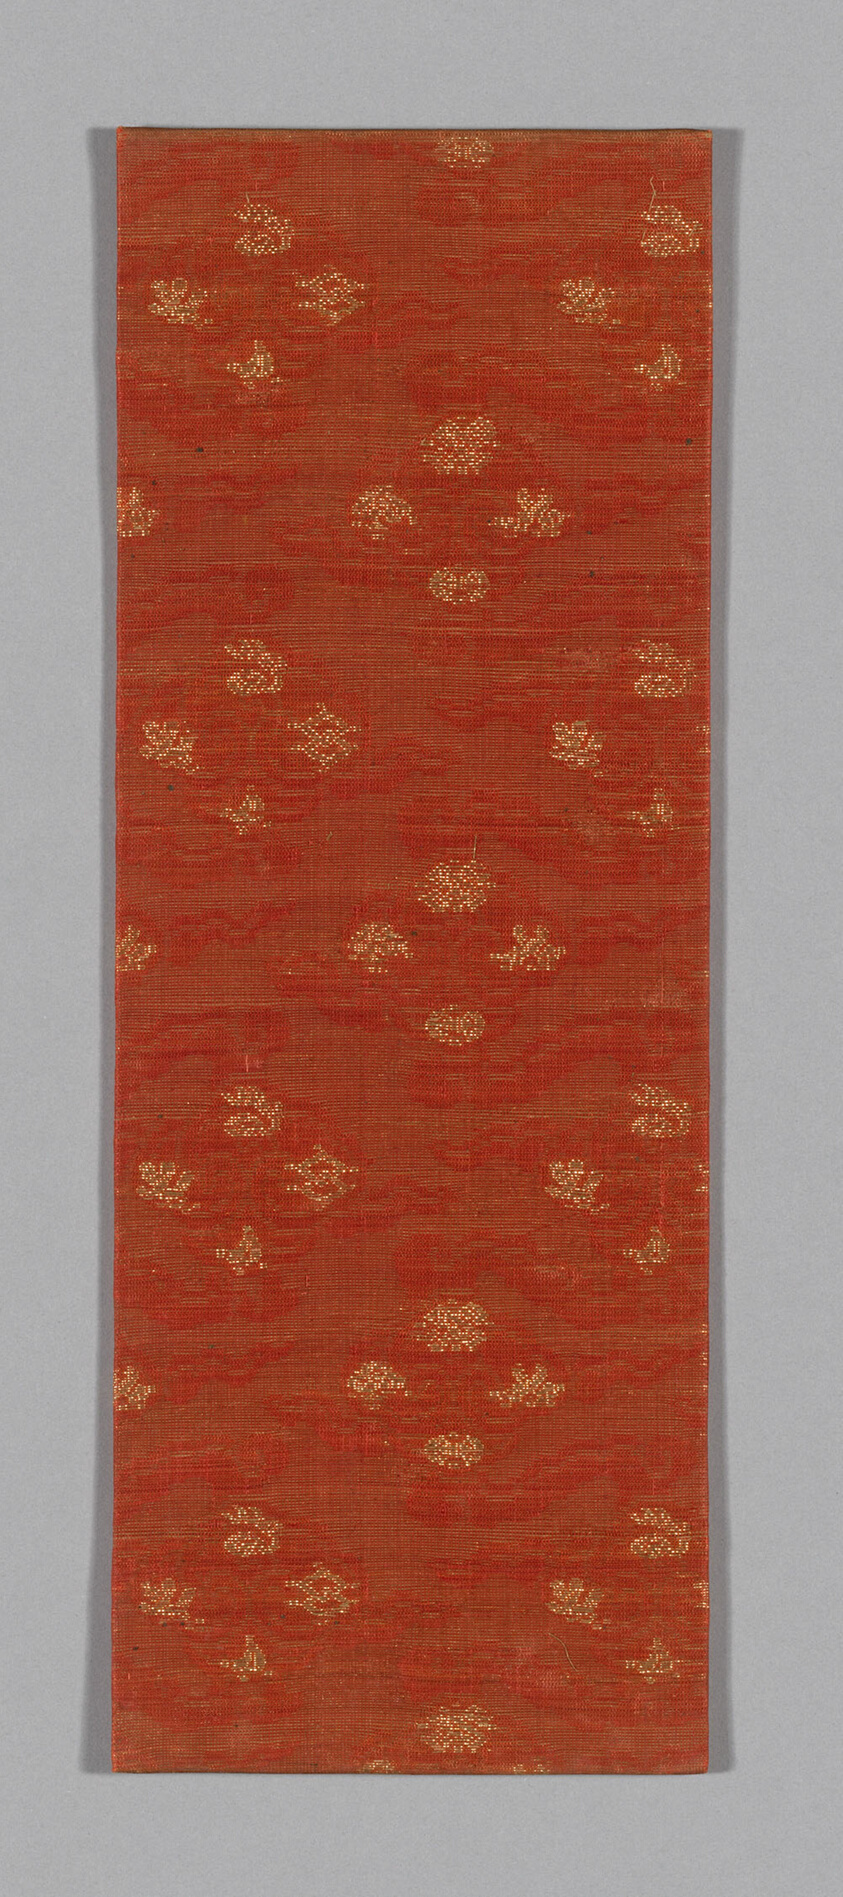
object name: Textile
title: Sutra Cover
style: ming, Chinese (culture or style), East Asian, asian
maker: China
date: Ming dynasty (1368–1644), c. 1590's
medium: Silk and gold-leaf-over-lacquered-paper strips, 1:1 plain gauze weave with supplementary brocading wefts and self-patterned by areas of plain weave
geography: China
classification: textile; weaving